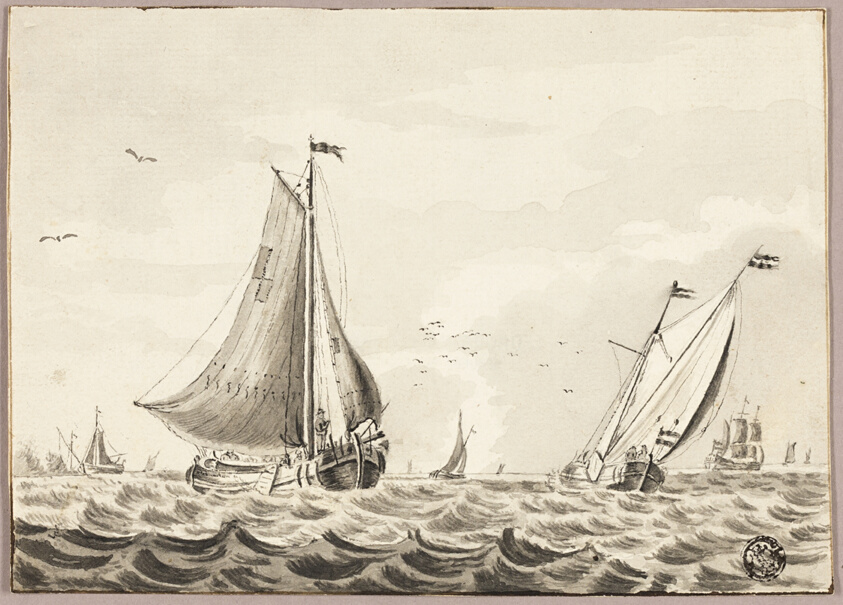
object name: Drawing and Watercolor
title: Sailboats on Sea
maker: Unknown artist (Dutch, 16th century)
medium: Brush and black ink, with brush and gray wash, over traces of graphite, on ivory laid paper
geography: Netherlands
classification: ink or chalk wash; drawings (visual works); prints and drawing